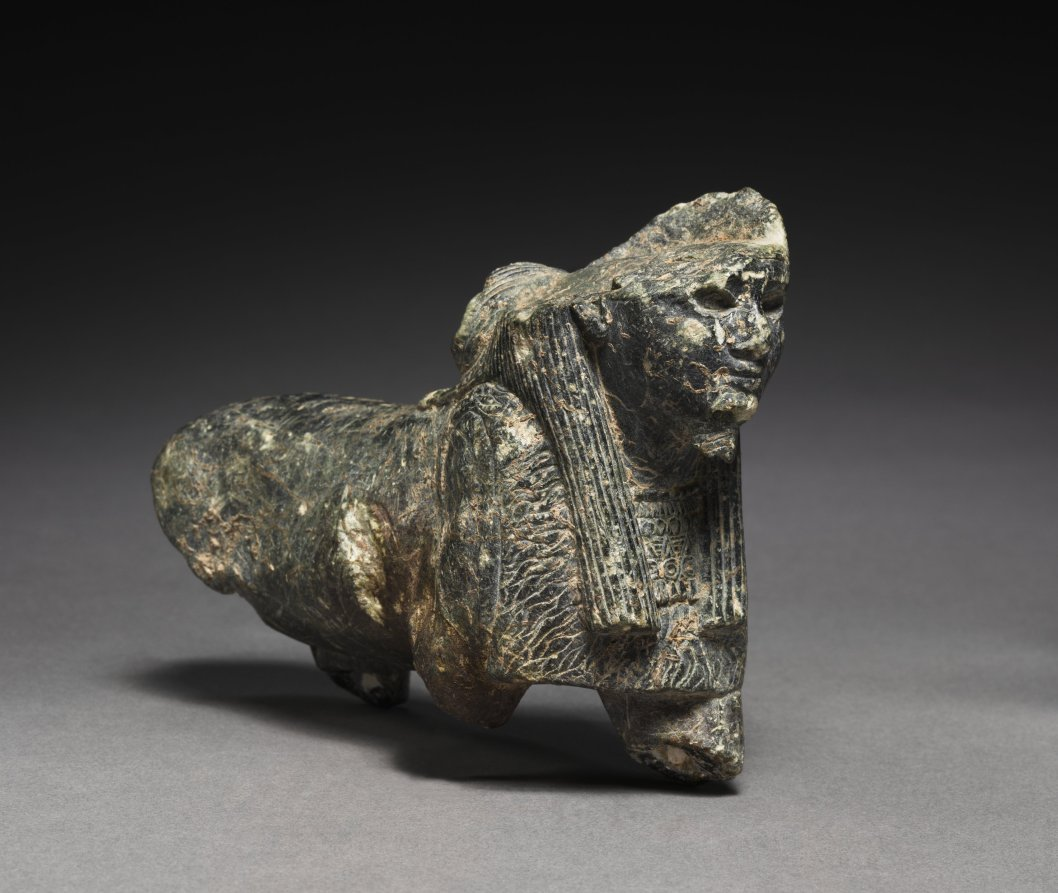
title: Tutu as Sphinx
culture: Egypt, Greco-Roman period (332 BCE–395 CE), Ptolemaic dynasty (305–30 BCE)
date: 150 BCE–30 CE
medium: gray steatite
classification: Sculpture